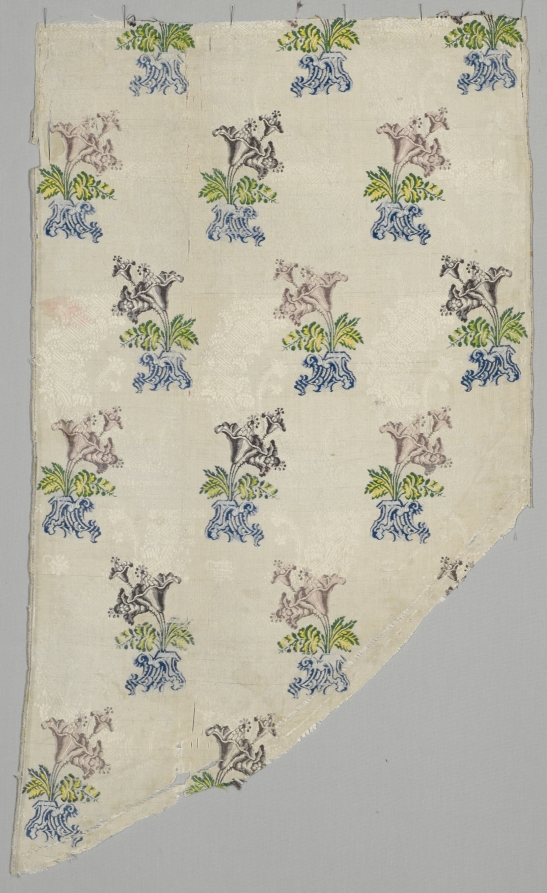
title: Length of Textile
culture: France, 18th century, Period of Louis XV (1723-1774)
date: 1723–1774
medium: plain cloth, brocaded; silk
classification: Textile